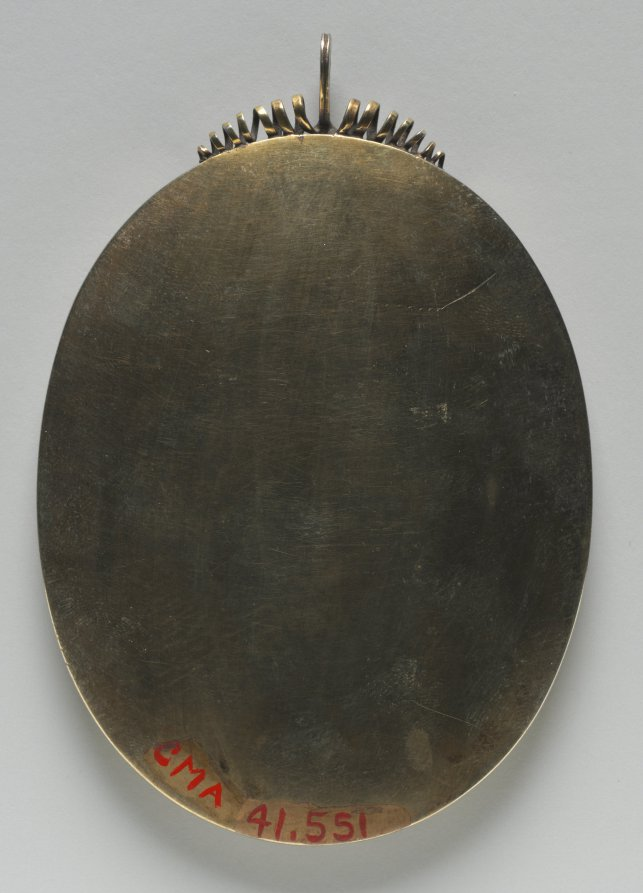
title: Portrait of a Man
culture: England, 17th century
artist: Samuel Cooper (British, 1608/09–1672)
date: c. 1655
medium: watercolor on vellum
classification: Portrait Miniature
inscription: signed left: SC [monogram]